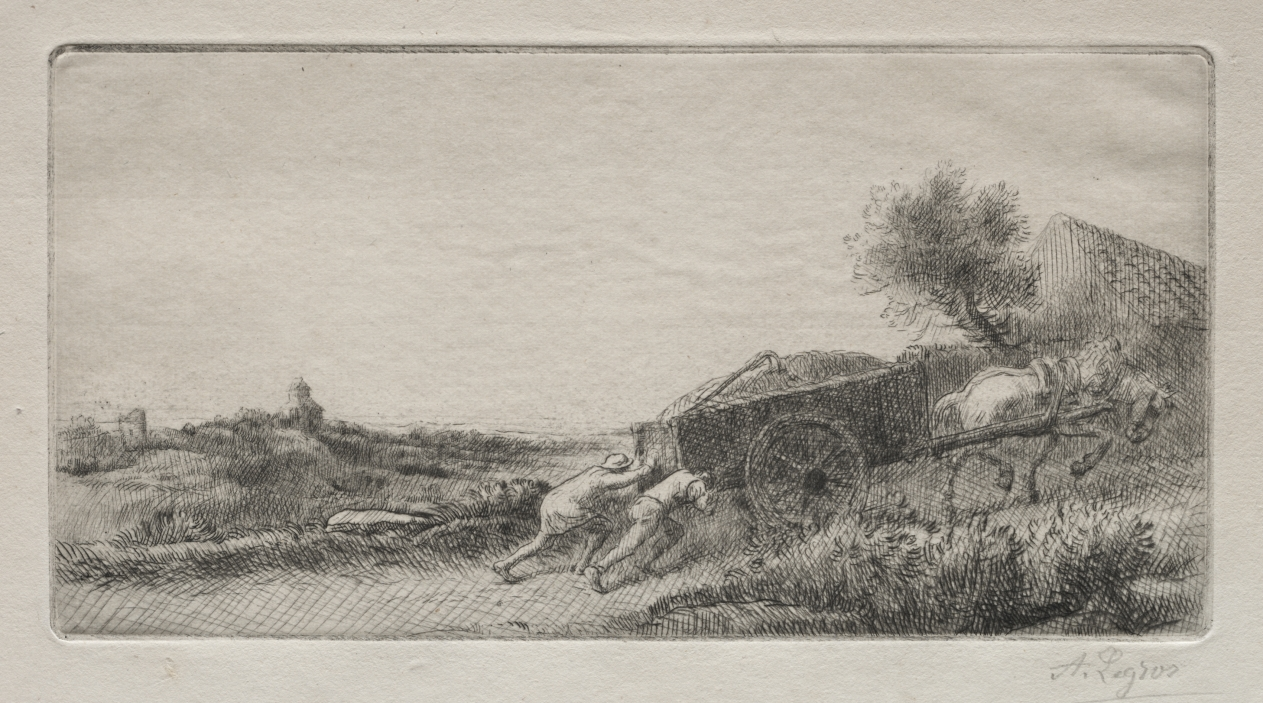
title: Bringing the Hay Home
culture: France, 19th-20th century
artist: Alphonse Legros (French, 1837–1911)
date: c. 1890–1904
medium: etching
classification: Print